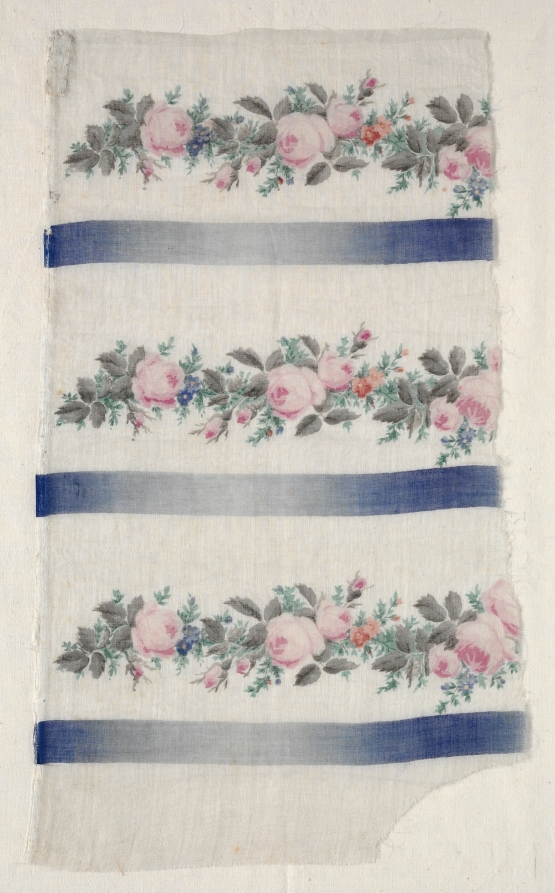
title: Painted Organdy Strip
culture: France, mid-19th century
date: mid 1800s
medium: painted organdy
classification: Textile